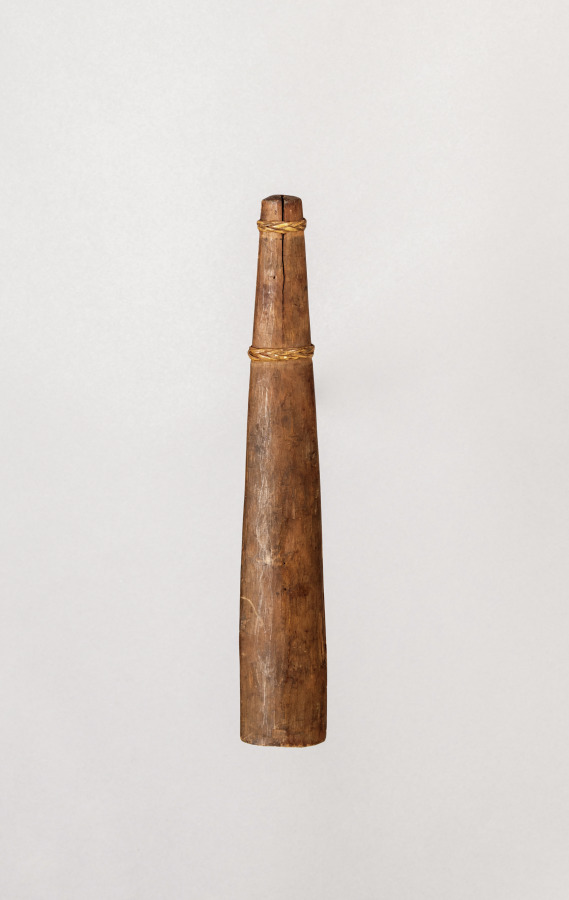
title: Sheath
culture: Philippines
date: before 1922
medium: Wood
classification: Arms and Armor